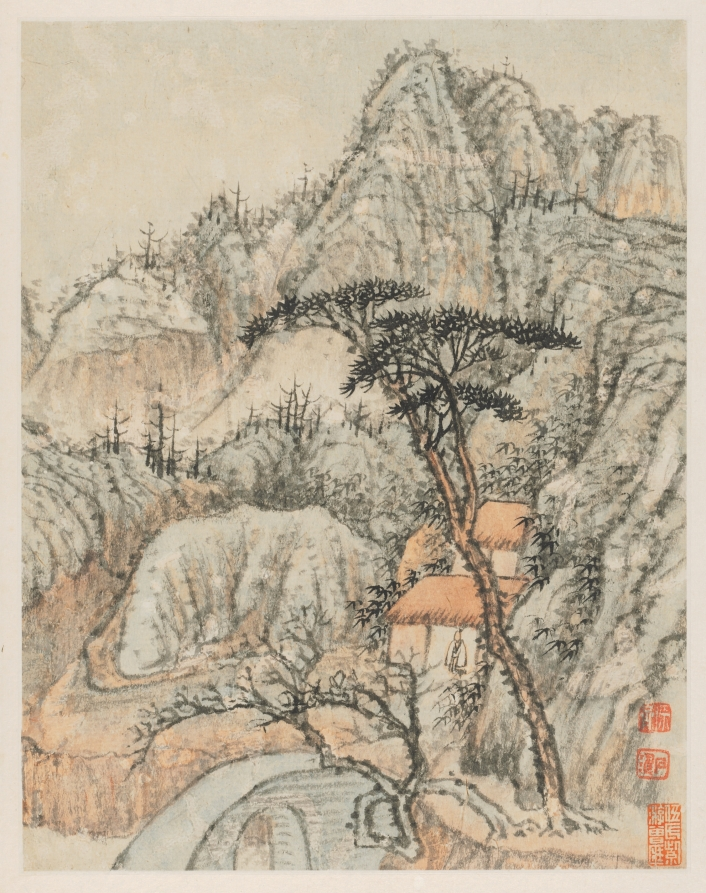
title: Reminiscences of Qinhuai River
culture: China, Qing dynasty (1644-1911)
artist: Shitao (Chinese, 1642–1707)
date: 1642–1707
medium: album leaf, ink and color on Song paper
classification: Painting